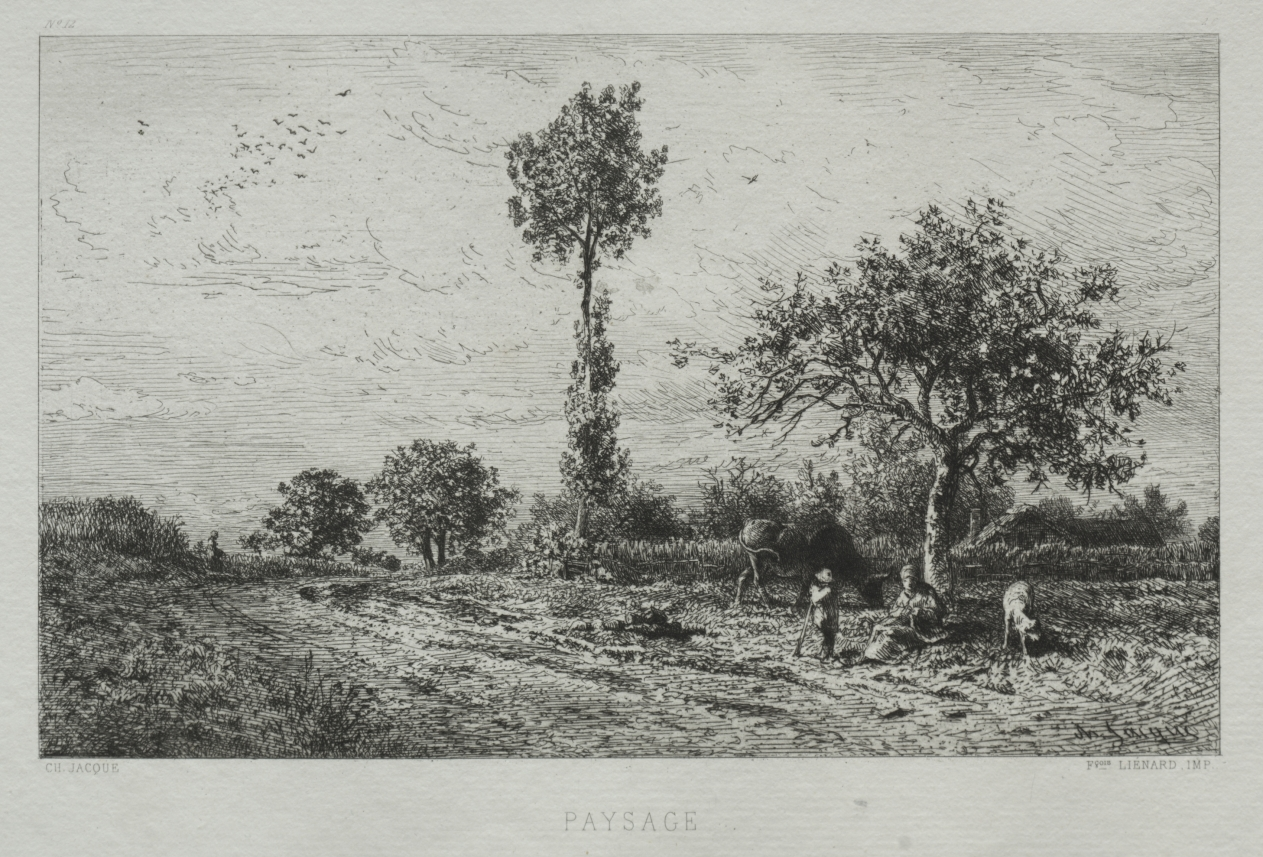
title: Landscape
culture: France, 19th century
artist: Charles-Émile Jacque (French, 1813–1894)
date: 1864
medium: etching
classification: Print